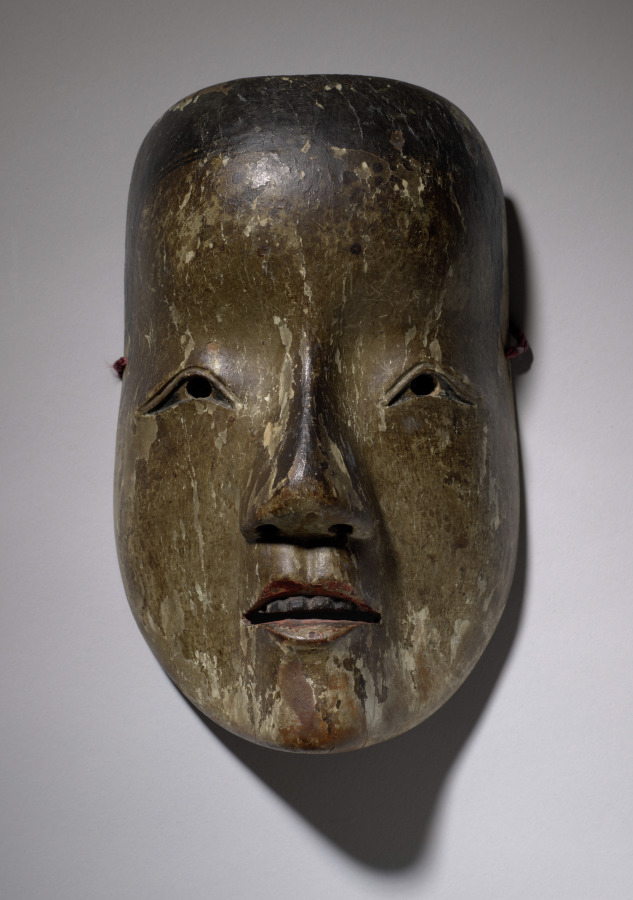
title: Noh Mask: Waka-onna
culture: Japan, Muromachi period (1392–1573)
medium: wood with polychromy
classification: Sculpture